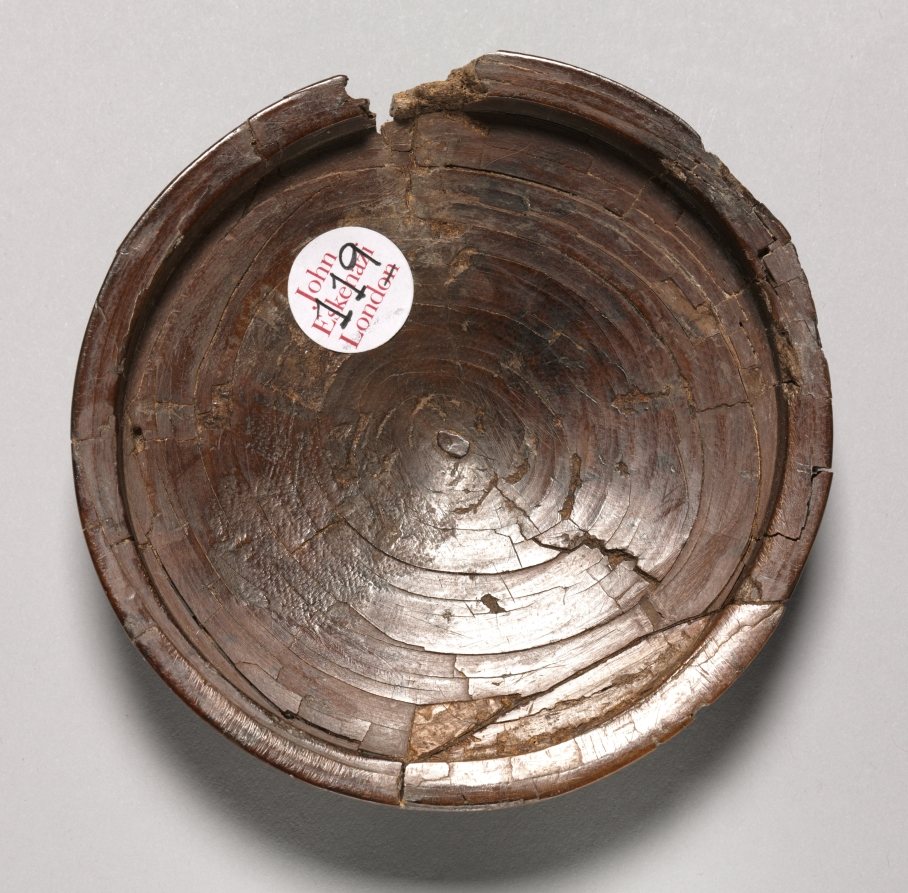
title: Roundel with Mermaids and Lotus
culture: India, Bengal, Chandraketugarh area, Shunga period (185–78 BCE)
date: c. 100 BCE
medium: ivory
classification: Ivory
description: This ivory disk was possibly part of a massive earring around which lobes were stretched so that they rest on the shoulders. Eight figures that are half woman and half fish hold hands in a ring around a series of concentric circles containing floral imagery. Their hands and tails make the repeated form of an auspicious trident-shaped symbol, often depicted with fish tails in combination with a lotus flower. The full-breasted forms, the tails, and the lotus flowers evoke the imagery of life-giving waters. A circle of eight female figures later comes to refer to the maidens of the eight directions of the sky (ashtadikpalikas).